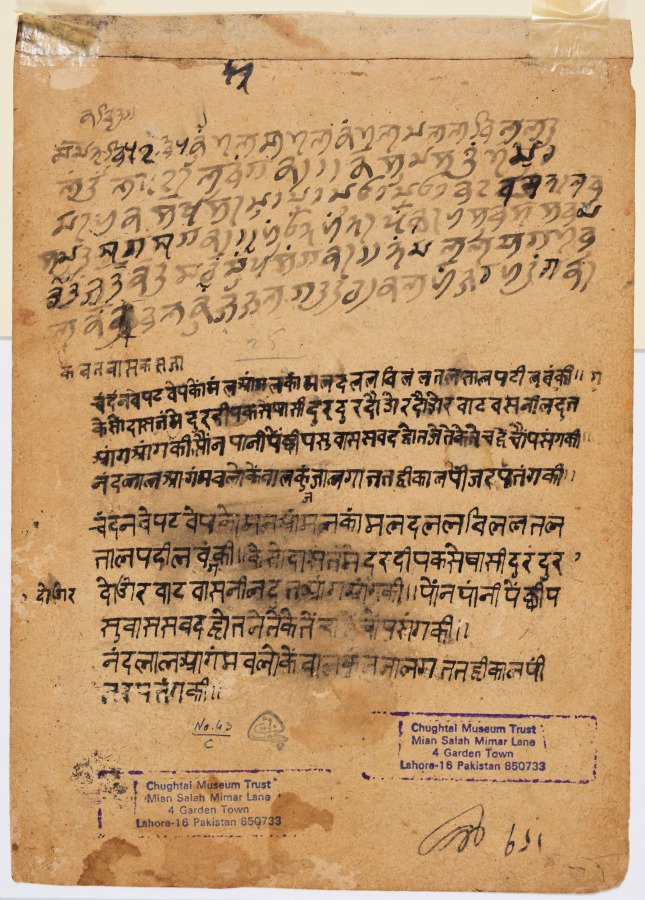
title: A heroine waiting for her lover: Vasakasajja Nayika, from the "Nurpur" Rasikapriya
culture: Northern India, Pahari kingdoms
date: c. 1750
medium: Gum tempera and gold on paper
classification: Painting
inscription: caṃdana vepata vepa komala āṃmala kaṃma lada lalavi lalata latā lapadī lavaṃga ki. kesodāsa tame dara dīpa ka sekhā sī dura dura doura vāṭa vāsa nīla duta āṃga āṃgakī. poṃna paṃni peṃci pasu vasa savada hota ne leke teṃ cāhe cāṃpa saṃga kī. naṃdalāla āgaṃma balokeṃ balakuṃja lagata tahi kānapīṃ tara pataṃga kī.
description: Vasakasajja has been described as Nayika who arranges the bed for making love. She is seated on a bed of leaves by a pond, anxiously waiting for her lover. The painter has faithfully followed the poet’s description of the scene and depicted the fair-complexioned Nayika radiating against the otherwise dark surrounding, illuminating the tryst.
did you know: The deer are depicted in a pair to highlight the Nayika’s separation.